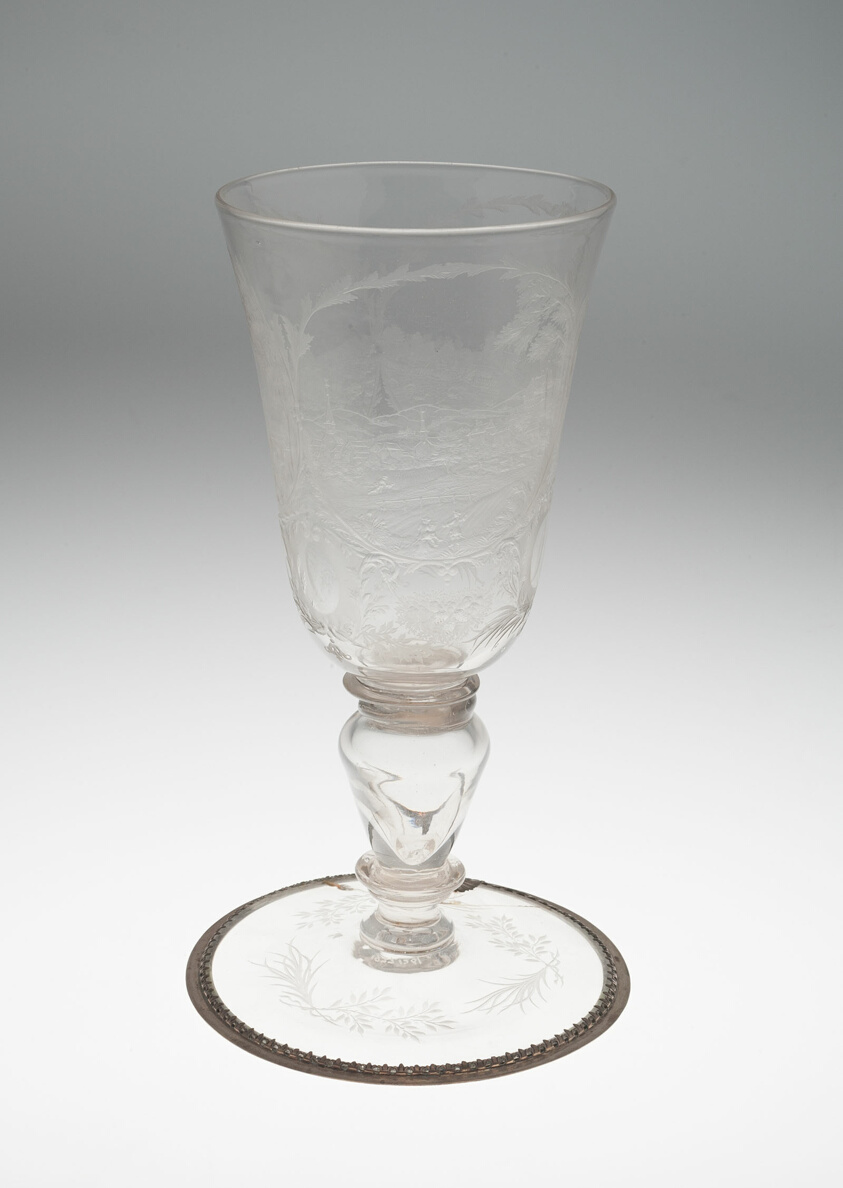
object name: Glass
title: Goblet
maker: Georg Friedrich Killinger (German, fl. 1696-1726); Germany, Nuremberg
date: 1723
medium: Glass with metal foot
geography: Nuremberg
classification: drinking vessel; glass; european decorative arts